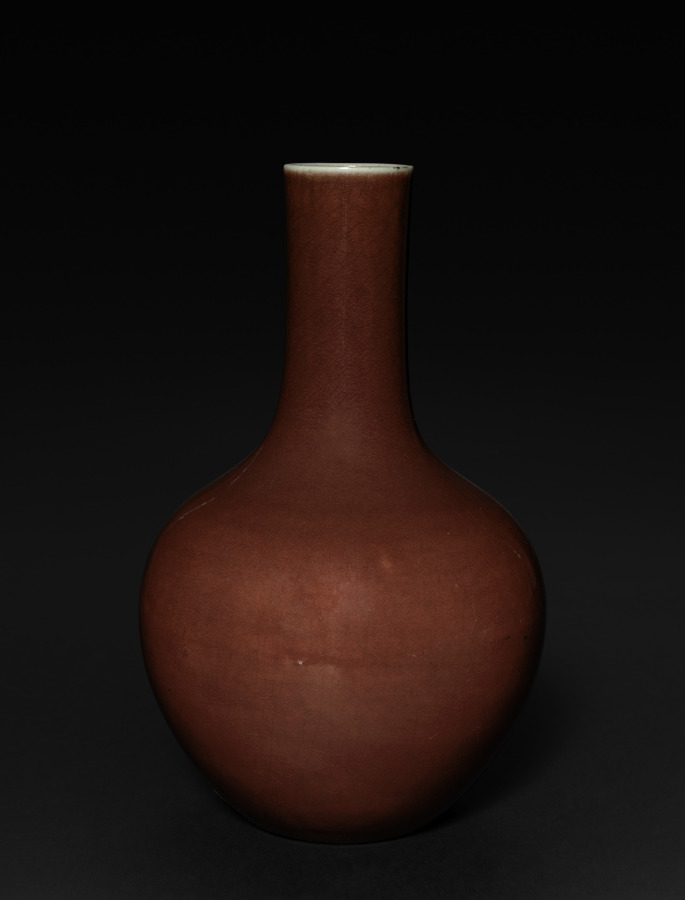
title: Bottle-shaped Vase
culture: China, Qing dynasty (1644–1911), Qianlong reign (1736–95)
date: 1736–95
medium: porcelain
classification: Ceramic